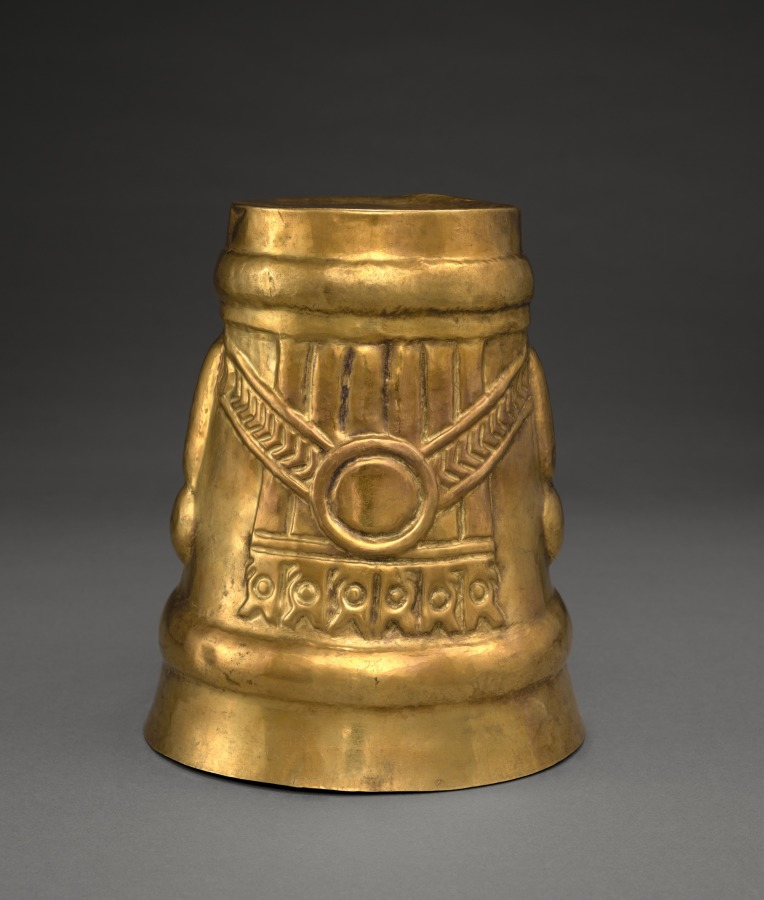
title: Head Beaker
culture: Central Andes (Peru), Lambayeque (Sicán) people, 10th century-12th century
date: 900–1100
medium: gold, hammered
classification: Metalwork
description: Metalworking flourished among the Lambayeque people of Peru’s north coast. Artists made large objects, including containers, in unprecedented numbers; one Lambayeque tomb contained nearly 200 gold or silver beakers. The head on this beaker has been interpreted as the visage of either the culture’s principal deity—its divinity signaled by its feline-like fangs—or the deified founder of the Lambayeque ruling dynasty. It is not known why the head is upright only when the beaker rests on its rim.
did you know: This drinking vessel holds close to 62 oz of fluid—almost half a gallon!